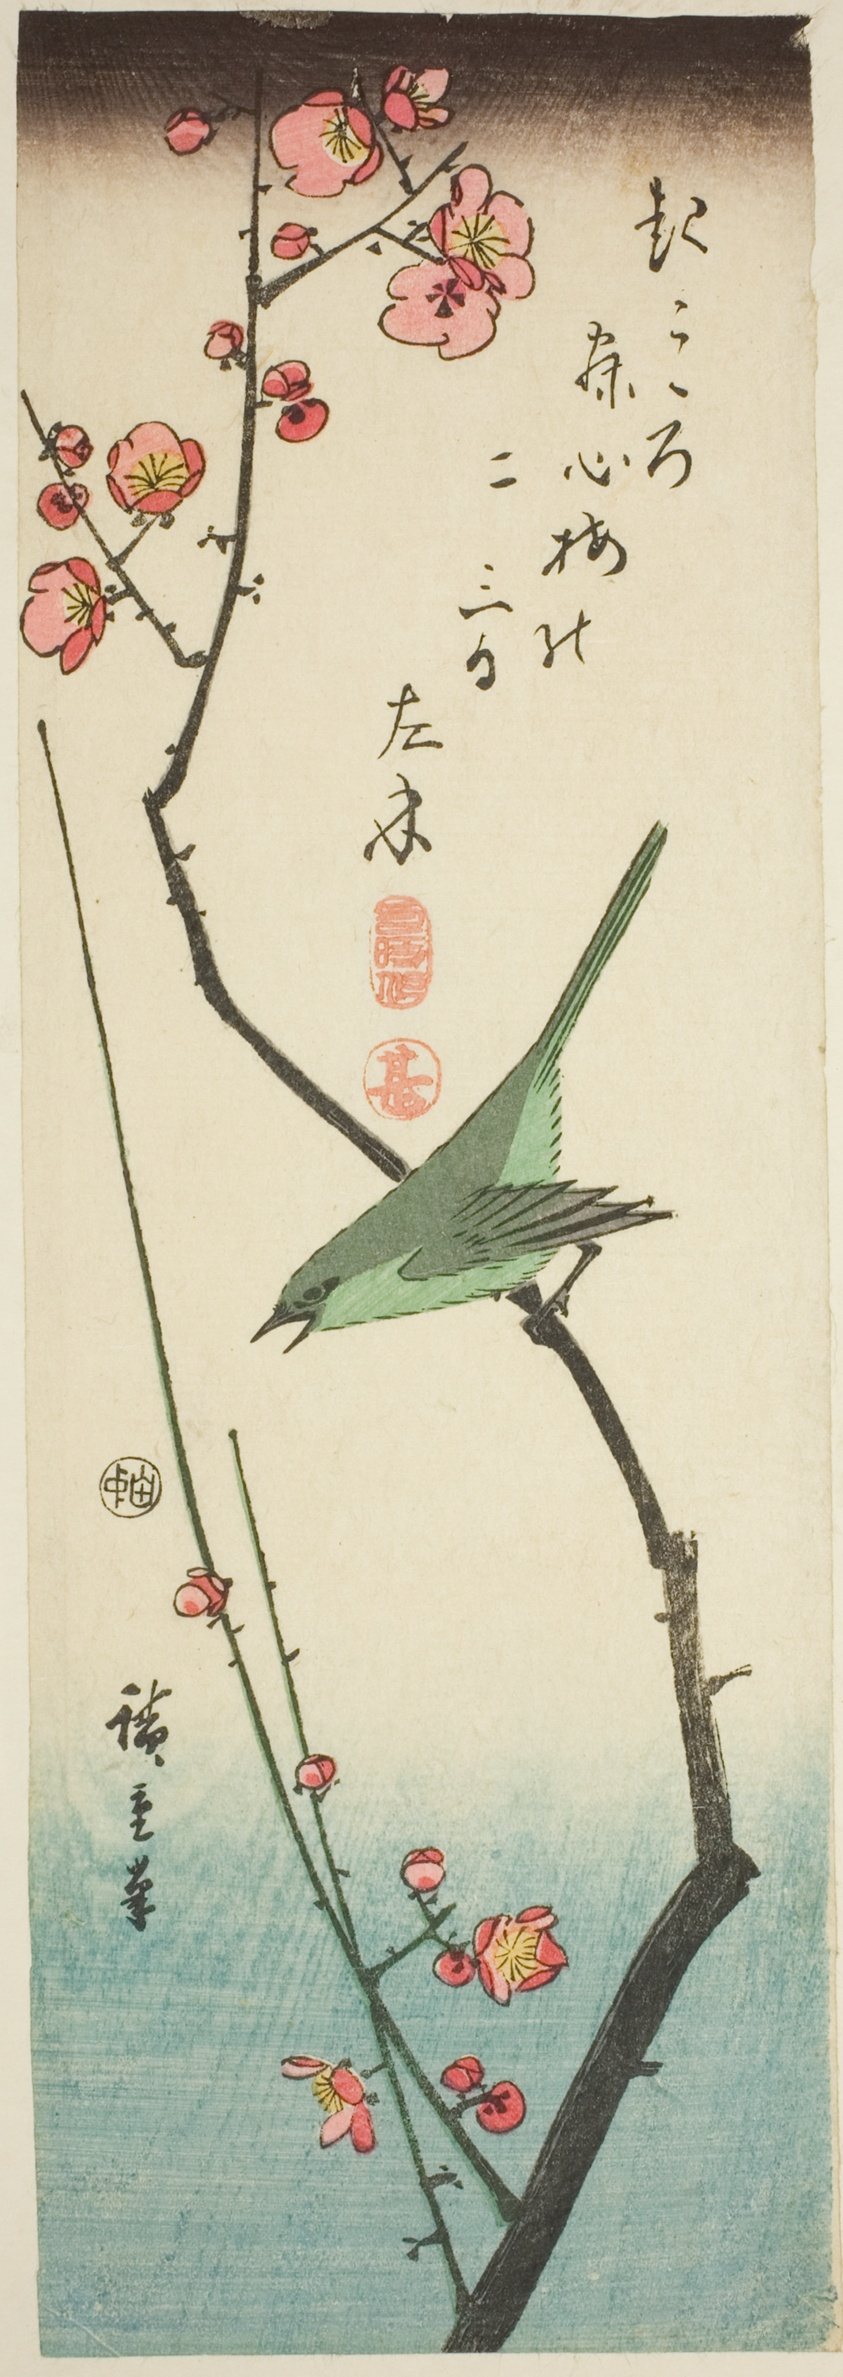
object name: Print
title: Bush warbler on plum branch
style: Japanese (culture or style)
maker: Utagawa Hiroshige 歌川 広重; Japanese, 1797-1858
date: c. 1843/47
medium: Color woodblock print; aitanzaku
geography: Japan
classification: woodblock print; print; asian art